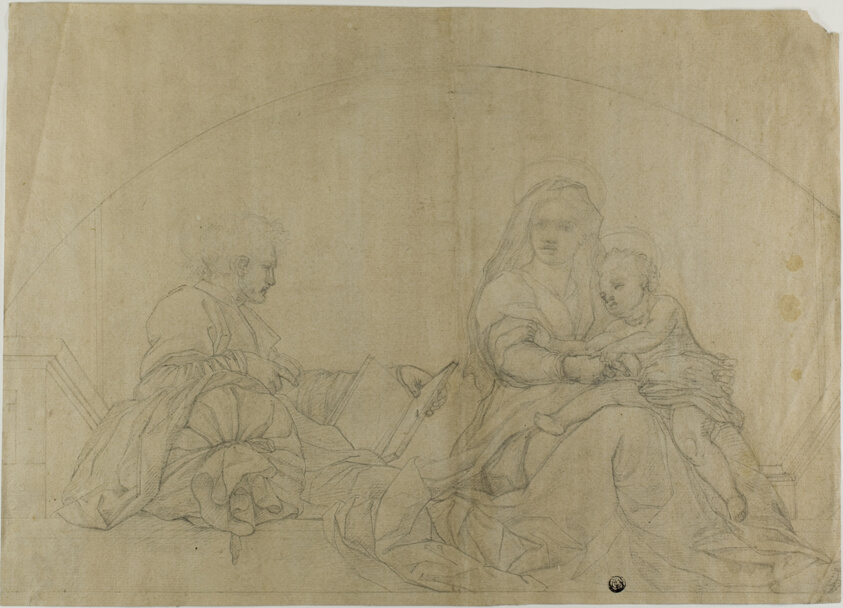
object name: Drawing and Watercolor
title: Madonna del Sacco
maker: After Andrea del Sarto; Italian, 1486-1530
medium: Graphite on ivory laid paper prepared with tan wash, incised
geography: Italy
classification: graphite; drawings (visual works); prints and drawing